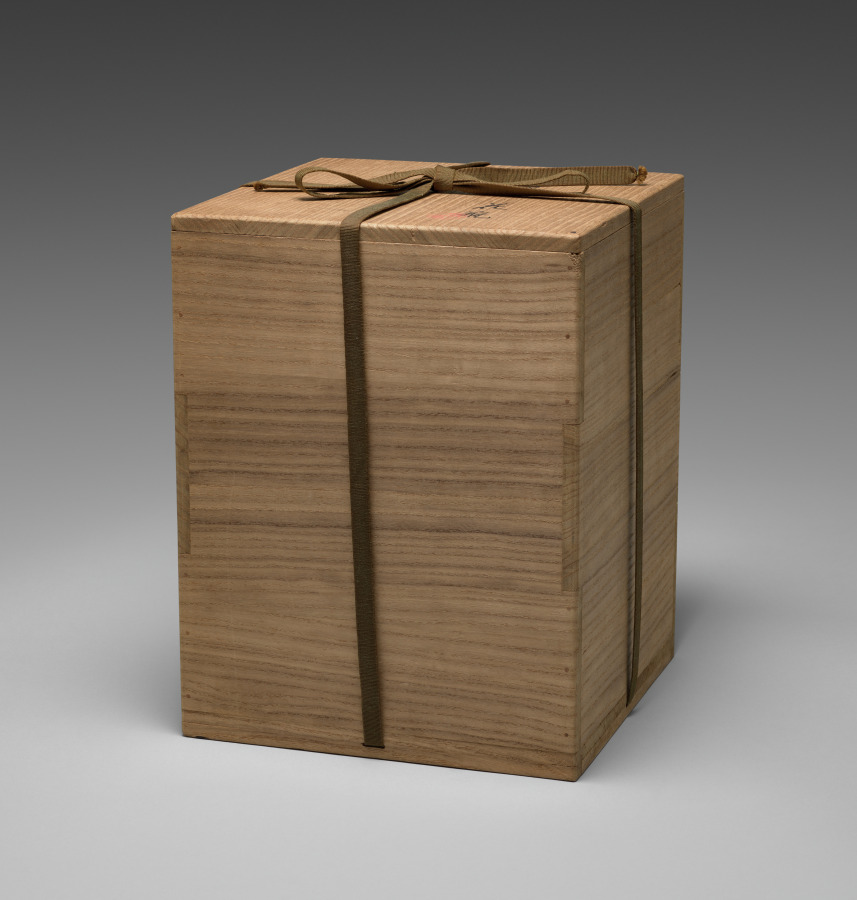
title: Guan-Shaped Vessel with Floral Scroll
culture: Japan, Taishō period (1912–26) or Shōwa period (1926–89)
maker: Seifū Yohei IV (Japanese, 1872–1951)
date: 1914–46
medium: Porcelain with molded and carved design and cream glaze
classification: Ceramic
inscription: 清風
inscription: 清風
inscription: 清風造之 【印】成山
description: Many of the vases created by Yohei III and IV were made with reference to and in emulation of Chinese ceramics in both form and glazing. The Seifu studio was inspired by later Chinese copies of two other archaic vessel types, the hu (Japanese ko) and guan (Japanese kan). In simple terms, in their original contexts, the hu and guan were storage jars that also appeared in ritual contexts. This hefty guan-shaped vase by Yohei IV has a floral scrolling pattern known in Japanese as karakusa, or “Chinese grasses.” The flowers are generally identified as lotus or peony. This flower vase might alternately be categorized as having the form of what is called a shukaiko in Japan, or a large vessel for holding wine. Shukaiko were created as early as the latter part of the Kamakura period after Yuan dynasty examples.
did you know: According to the box lid, the vase is a kanpakuji, "bright-jewel white porcelain," work.